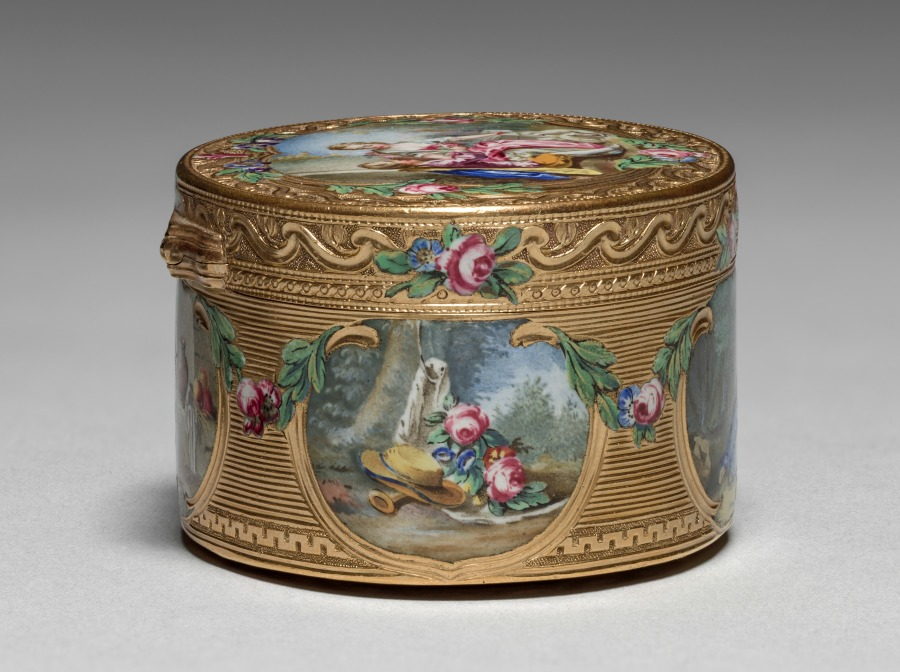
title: Snuff Box (Tabatière)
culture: France, 18th century (style of Louis XV)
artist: Francois Guillaume Tiron (French)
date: 1761–62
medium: gold and enamel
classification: Miscellaneous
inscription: [Maker's mark of Francois-Guillaume Tiron, master goldsmith in 1747, inside cover]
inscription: [Warden's mark, Paris, 1761-1762, inside cover]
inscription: [Charge mark of Eloi Brichard and Etienne Somfoye, Paris, 1756-1762, inside cover]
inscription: [Maker's mark of Francois-Guillaume Tiron, inside bottom]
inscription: [Warden's mark, 1761-1762, inside bottom]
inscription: [Charge mark of Brichard and Somfoye, inside bottom]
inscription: [Maker's mark of FG Tiron, left wall]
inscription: [Charge mark of Brichard and Somfoye, left wall]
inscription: [Warden's mark, Paris, 1761-1762, left wall]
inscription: [Discharge mark of J.J. Prevost, Paris, 1762-1768, bezel at right]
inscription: [Engraved number, maybe retailer's number]: "n. 13676"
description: The pastoral scenes that decorate this box are typical of the style of François Boucher, a celebrated painter of the period whose works were popularly reproduced on decorative arts. Snuff boxes, used practically as containers for powdered tobacco, were often decorated with miniature reproductions of notable works. The miniature on the cover is inspired by Boucher’s The Galant Pastor (Le Pasteur Gallant) (1738) and that on the bottom by The Amusement of the Shepherd Girl (L’Amusement de la Bergère) (1700s).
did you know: François Boucher was a favorite of the French royal court of Louis XV and named first painter of the king in 1765.